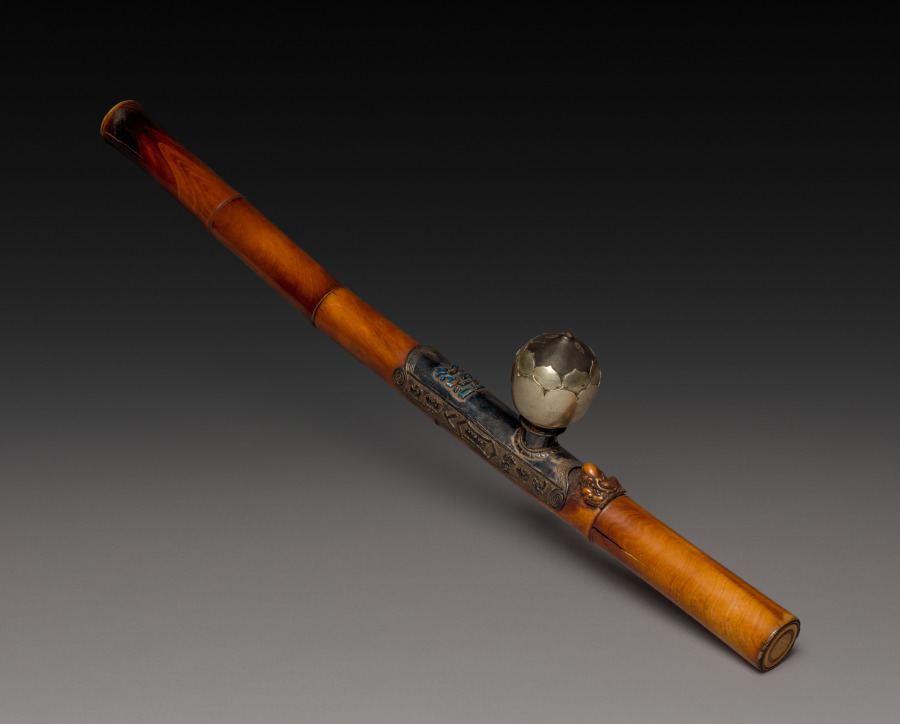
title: Opium Pipe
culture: China, Qing dynasty (1644-1911)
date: 1800s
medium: ivory stem decorated with silver and enamel work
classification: Miscellaneous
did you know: The ivory stem has five sections.